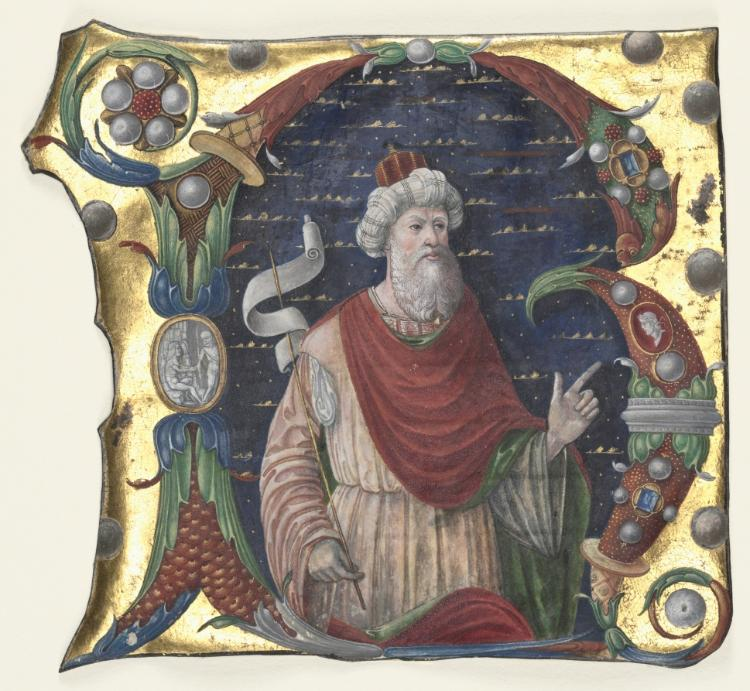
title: Initial R from a Choral Book with King David(?)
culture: Italy, Ferrara, 15th century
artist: attributed to Guglielmo Giraldi del Magri [or del Magro] (Italian)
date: c. 1470–1480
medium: ink, tempera and gold on vellum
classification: Manuscript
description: This sumptuous initial is painted in deep hues set against a burnished gold ground in order to achieve a rich jewellike effect. The design of the letter incorporates such motifs as gemstones, pearls, and classical cameos—much favored by Renaissance princes—to add further refinement to the image.